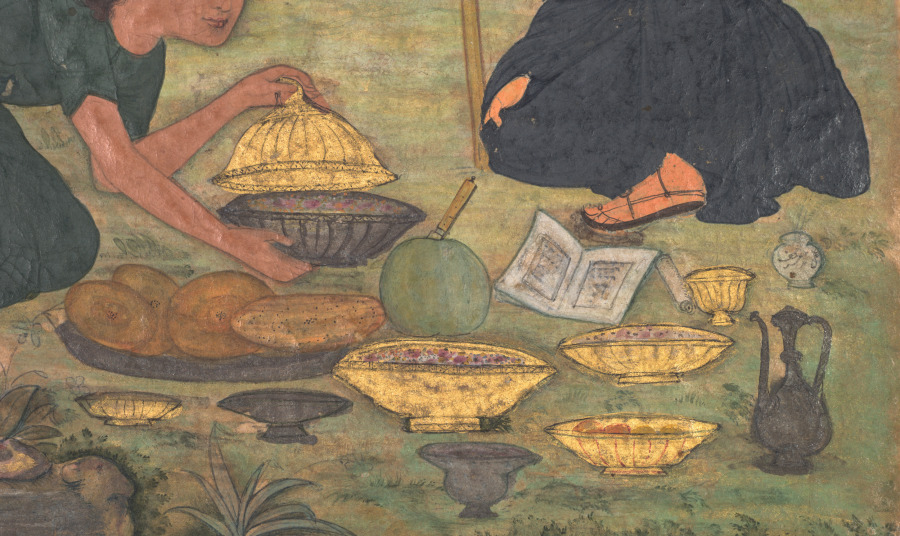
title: Angels bring food to Jesus in the wilderness (folio 55 recto), from a Mirror of Holiness (Mir’at al-quds) of Father Jerome Xavier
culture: Mughal India, Allahabad, made for Prince Salim (1569–1627)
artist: Muhammad Sharif (Indian, active c. 1600)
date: 1602–4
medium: Gum tempera, ink, color, and gold on paper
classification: Manuscript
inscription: Signature of the artist, Muhammad Sharif (Indian, active c. 1600), is written in the tiny pot by Jesus's foot.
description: To end his 40-day fast, five angels brought Jesus refreshments from heaven: breads, melons each with a knife for convenient cutting, fresh leeks, and what appear to be fragrant rice dishes and curries, along with cups of wine. Four of the angels are dressed in robes, and one is clothed only in feathers. After his baptism, Jesus spent 40 days and nights in the desert where he fasted, practiced spiritual exercises, and successfully resisted the temptations of Satan. Many of the rocks in this painting have faces, called grotesques. This page is the only surviving folio from this manuscript that has an artist’s signature, written in the tiny pot by Jesus’s foot.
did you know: The artist has put faces in the rocks, following a Persian convention.